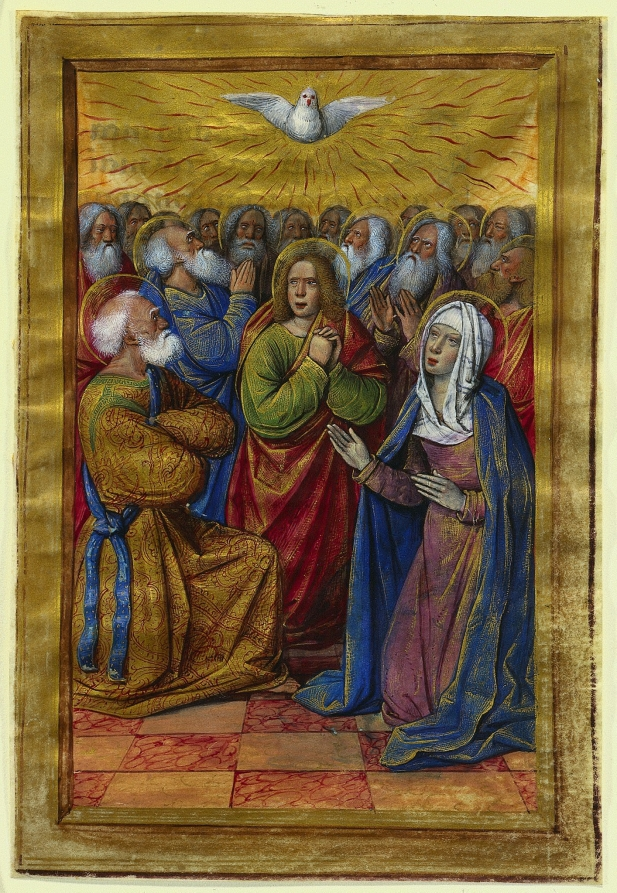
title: Miniature from a Book of Hours: The Pentecost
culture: France, Tours, early 16th Century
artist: Jean Poyet (French)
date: c. 1500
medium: Tempera, and gold on vellum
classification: Manuscript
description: In the 1400s, the city of Tours became the seat of the French royal court. With a simultaneous flourishing of the arts in the city, Tours became the center of an important school of illuminators and painters. The work of Jean Poyet, an influential artist in this school, was much in demand within court circles. Not only an illuminator, Poyet was also a painter and draftsman whose travels to Renaissance Italy influenced his style. He was a master of perspective and the subtle use of color and light to create figures who realistically occupy the space.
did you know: Jean Poyet was multitalented; he was an illuminator, painter, and draftsman.